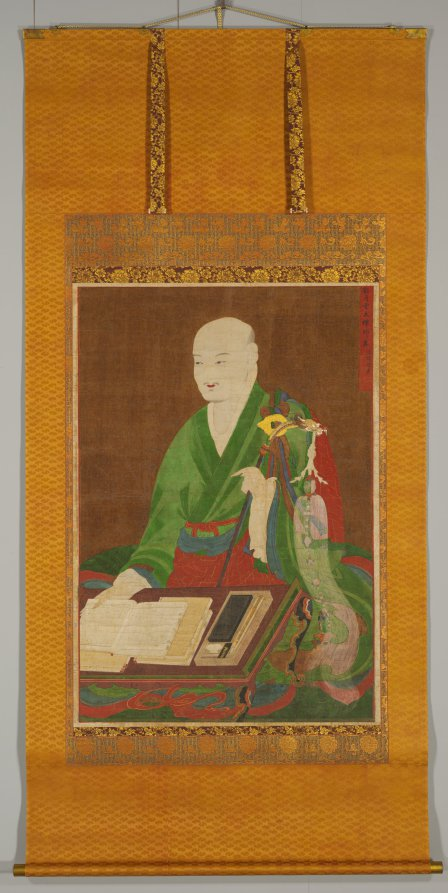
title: Portrait of the Great Master Yeongwoldang Eungjin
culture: Korea, Joseon dynasty (1392–1910)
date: 1700s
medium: hanging scroll, ink, color and gold on silk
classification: Painting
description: The monk in this portrait, identified by an inscription in a red cartouche at the upper right of this painting, is the Great Master Yeongwoldang Eungjin. Portraits of this type, painted following the death of an important Buddhist monk, are known as jinyeong. His elevated status is indicated by his fine monastic garments, the dragon-headed ceremonial fly whisk he holds in his left hand, and the Buddhist scripture in his right hand. The writing box on his desk, with brushes, ink stone, and water dropper, further emphasizes his prowess as a man of deep insight into the Buddhist teachings.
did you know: In East Asian Buddhist temples, portraits of Buddhist monks are housed in special dedicated halls as icons of spiritual ancestors to the community of Buddhist monks and nuns.